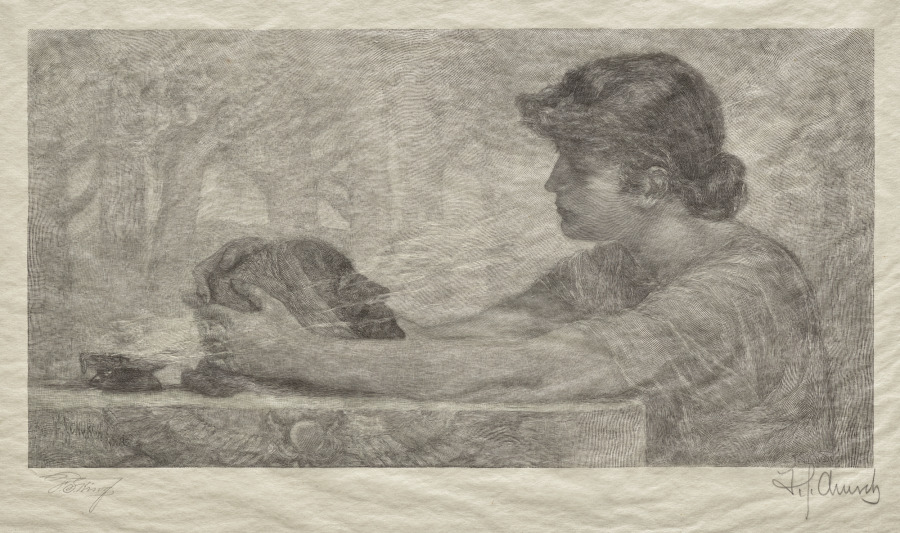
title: The Sibyl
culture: America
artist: Francis Scott King (American, 1850–1913)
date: 1887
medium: wood engraving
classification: Print